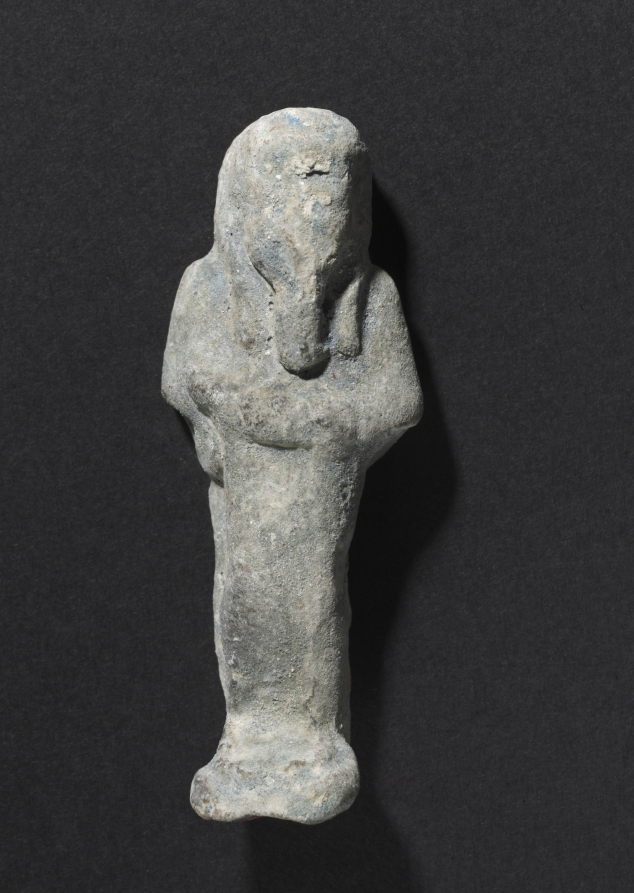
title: Shawabty of Ditamenpaankh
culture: Egypt, Late period (715–332 BCE), Dynasty 25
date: 715–656 BCE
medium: terracotta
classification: Funerary Equipment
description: High demand for shawabtys in the Late Period, a time when as many as 400 or more shawabtys were placed in the tomb with the deceased, gave rise to a specialized container for storing them: the shawabty box. This example is inscribed for the lady of the house, Ditamenpaankh, and was probably one of a pair originally made for her. The single-masted boat on the box's lid is perhaps an allusion to the pilgrimage of the deceased to the holy city of Abydos, the cult city of Osiris, king of the dead. The shawabtys inside are crude, mass-produced examples cast in an open mold. Made of terracotta, their blue paint imitates more costly shawabtys made of faience. As for the shawabty spell, it has been removed from its traditional location on the shawabty's front and relocated onto the sides of box, where it needed only to be written once, thus expediting production.